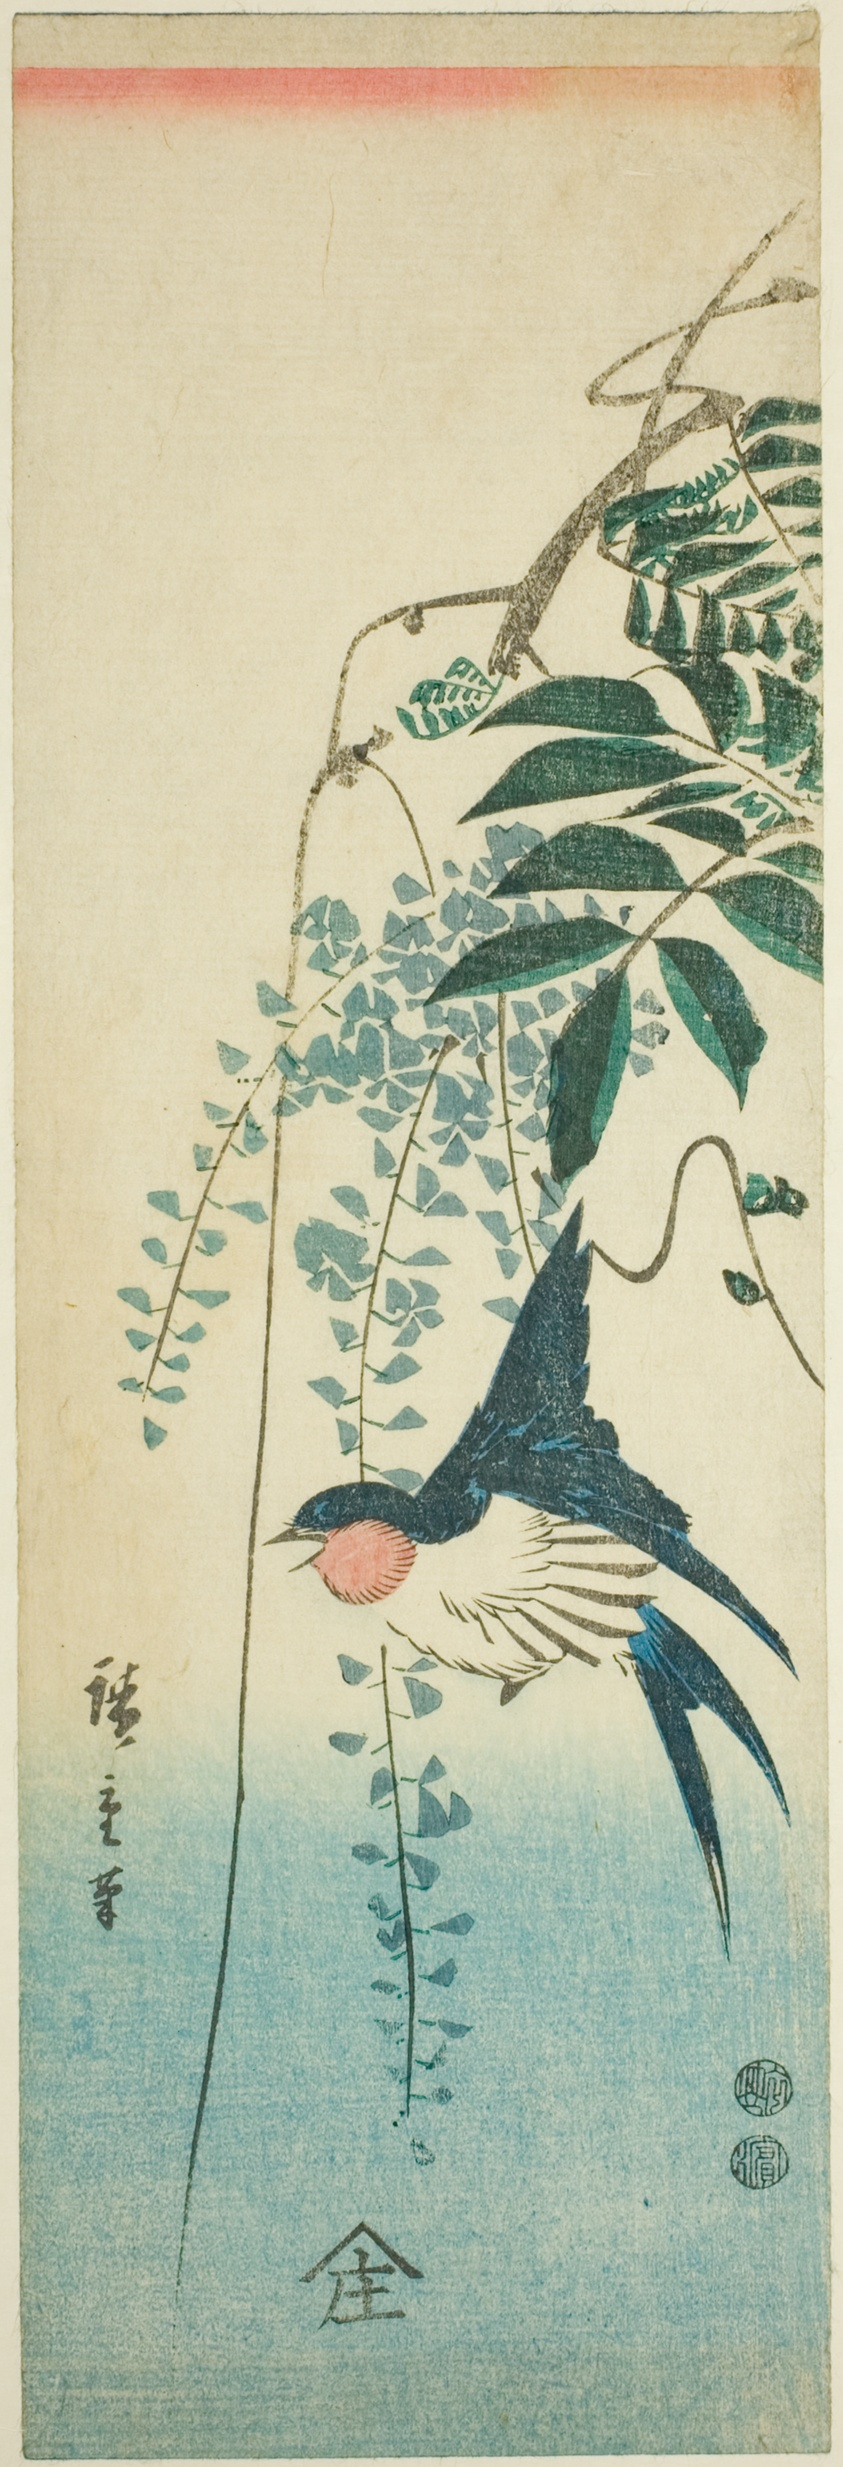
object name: Print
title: Swallow and wisteria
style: Japanese (culture or style)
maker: Utagawa Hiroshige 歌川 広重; Japanese, 1797-1858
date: c. 1847/52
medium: Color woodblock print; aitanzaku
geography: Japan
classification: woodblock print; print; asian art